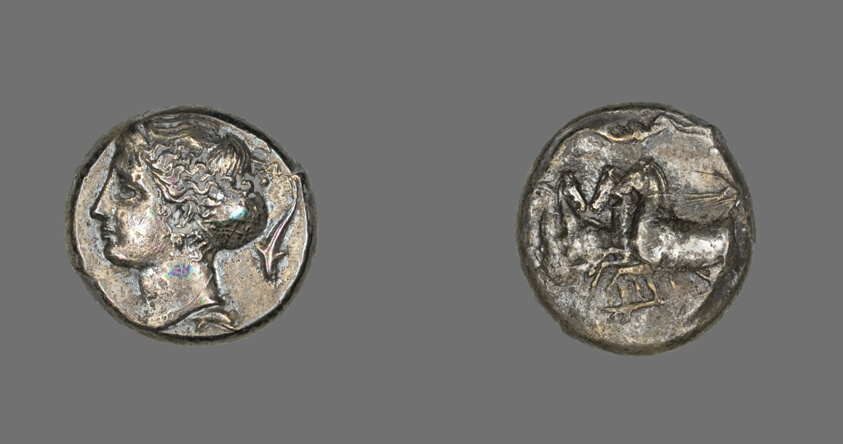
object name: Coin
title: Tetradrachm (Coin) Depicting the Nymph Arethusa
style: greek, ancient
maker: Greek, minted in Syracuse, Sicily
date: 413–399 BCE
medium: Silver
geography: Syracuse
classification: coin; ancient art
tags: Chariots